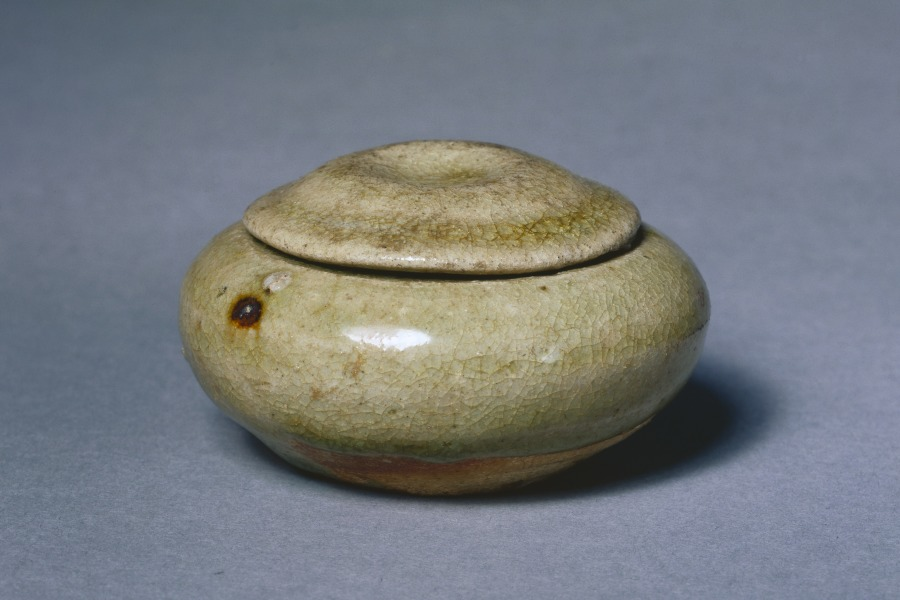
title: Incense Box: Seto Ware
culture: Japan, Kamakura period (1185–1333)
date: 1200s–1300s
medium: glazed stoneware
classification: Ceramic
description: Old Seto, also called Koseto ware, was typically coated with an ash glaze in the mineral feldspar, which produced a yellow or grayish-green glaze. This palette appealed to medieval Buddhist priests and samurai alike. The practice of burning incense in religious, court, and domestic settings dates from the early 700s in Japan.